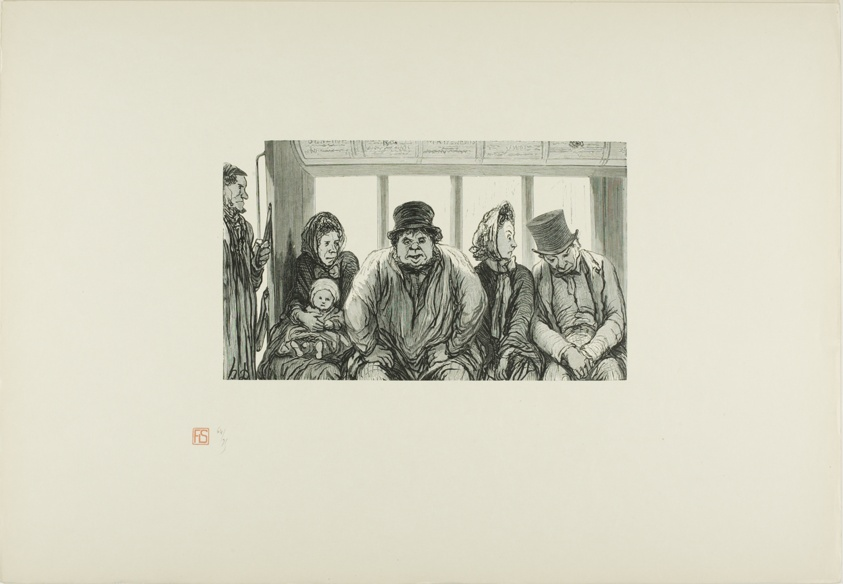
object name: Print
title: Interior of a Bus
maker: Charles Maurand (French, 1824-1904); after Honoré Victorin Daumier (French, 1808-1879); printed by François Louis Schmied (Swiss, 1873-1941); published by Jules Meynial (French, 20th century)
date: 1864, printed 1920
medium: Wood engraving on cream Japanese paper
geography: France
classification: wood engraving; print; prints and drawing